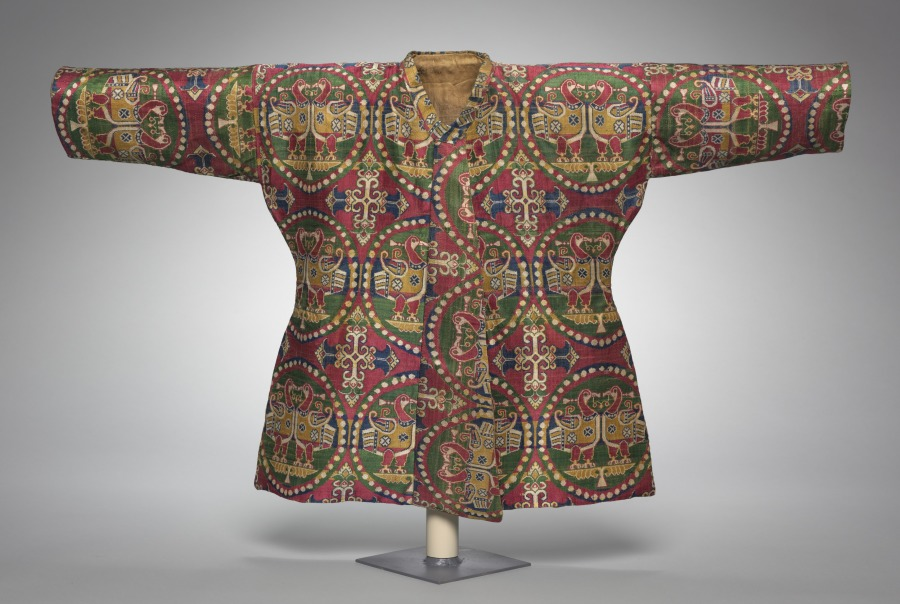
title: Child’s Coat with Ducks in Pearl Medallions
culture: Probably Sogdia (present-day Uzbekistan); China, Tang dynasty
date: 700s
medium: Silk: weft-faced compound twill weave (samite)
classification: Garment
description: The coat’s outer fabric is woven in five brilliant colors featuring paired ducks in pearl roundels, hallmarks of the precious and highly desired silks from Sogdia. The coat’s inner lining is a twill damask with a floral pattern made in China. The combination of Sogdian and Chinese silks in one garment with Tibetan ownership history is evidence of the vital exchange and cultural interaction among the peoples living along the trade routes of the Silk Road. This precious coat was presumably made for a Tibetan prince. Given the coat’s pristine condition, though, it is unclear whether the garment was ever worn, or was used as a diplomatic gift or perhaps as currency.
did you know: This coat is part of a set of garments that originally included an outer pair of pants and silk boots made from the same fabric.